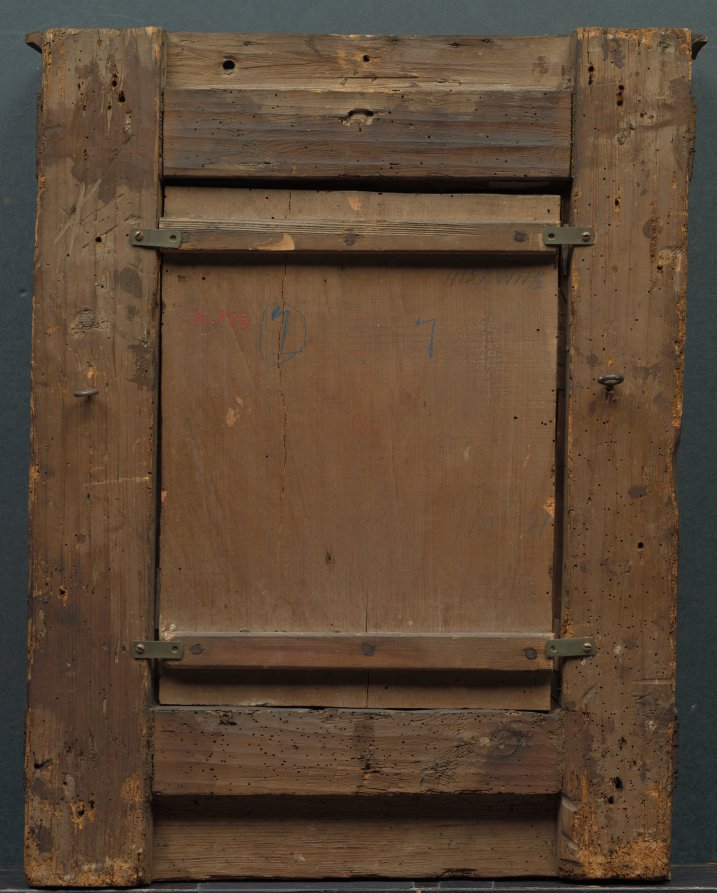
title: Virgin and Child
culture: Byzantine (Dalmatian?), 15th century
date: 1400s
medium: tempera and gold on wood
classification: Painting